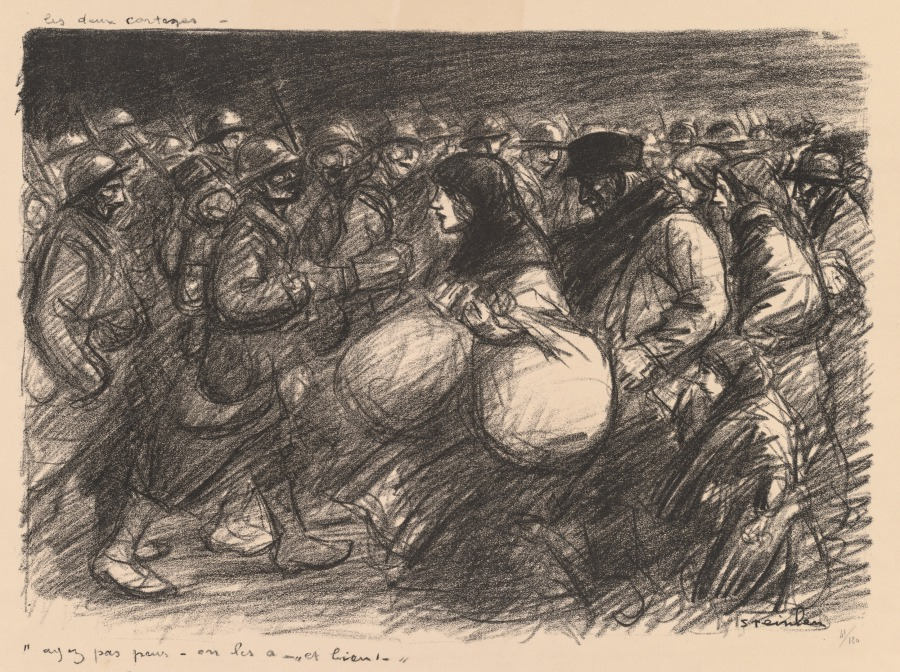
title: War Sketches: The Two Processions (Croquis de guerre: Les deux cortèges – “Ayez pas peur - on les a - et bien!”)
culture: Switzerland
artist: Théophile Alexandre Steinlen (Swiss, 1859–1923)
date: 1916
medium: lithograph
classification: Print